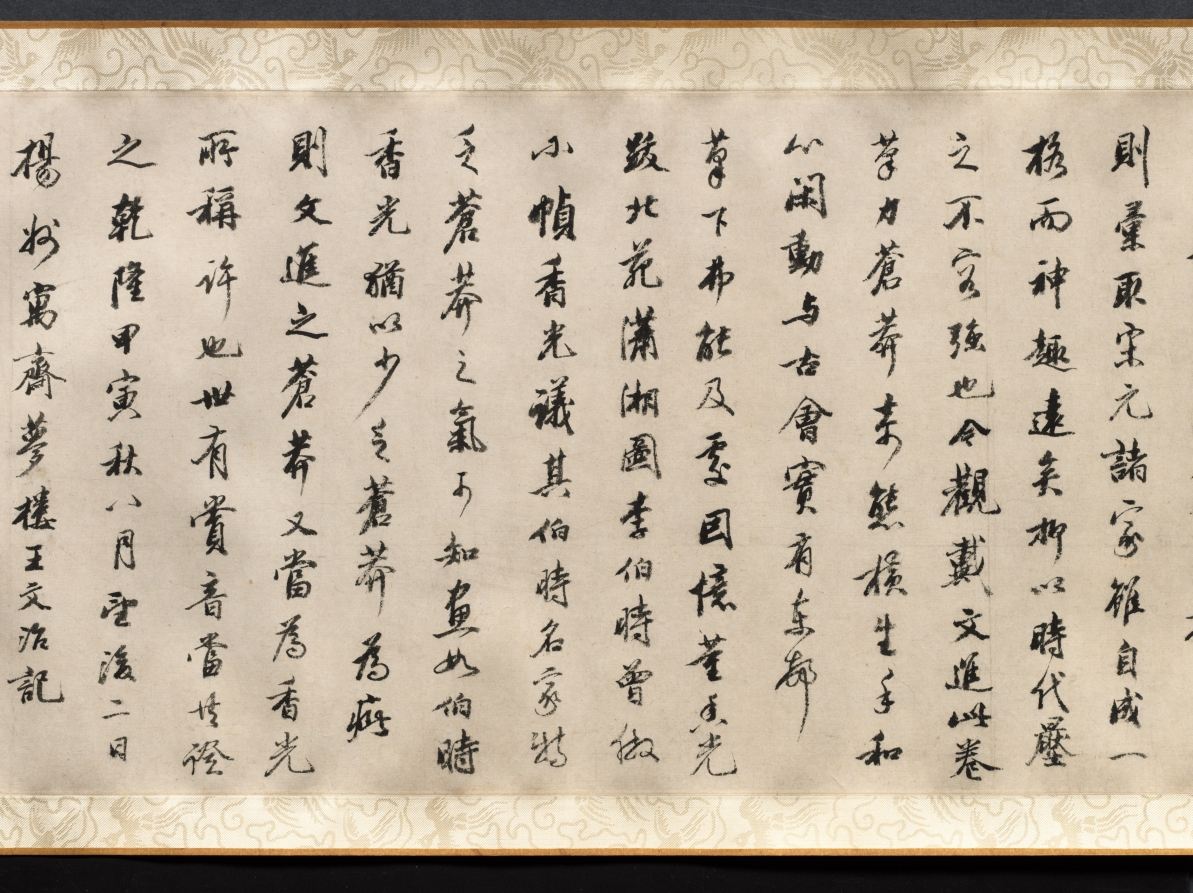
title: Ten Thousand Li of the Yangzi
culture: China, Ming dynasty (1368–1644)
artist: Dai Jin (Chinese, 1388–1462)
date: c. 1400s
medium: Handscroll; ink and color on paper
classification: Painting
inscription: Two colophons at end. Artist's seals: Dai Jin 戴進 and Wenjin 文進.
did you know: Dai Jin is traditionally considered the founder of the Zhe School, a style of landscape painting.